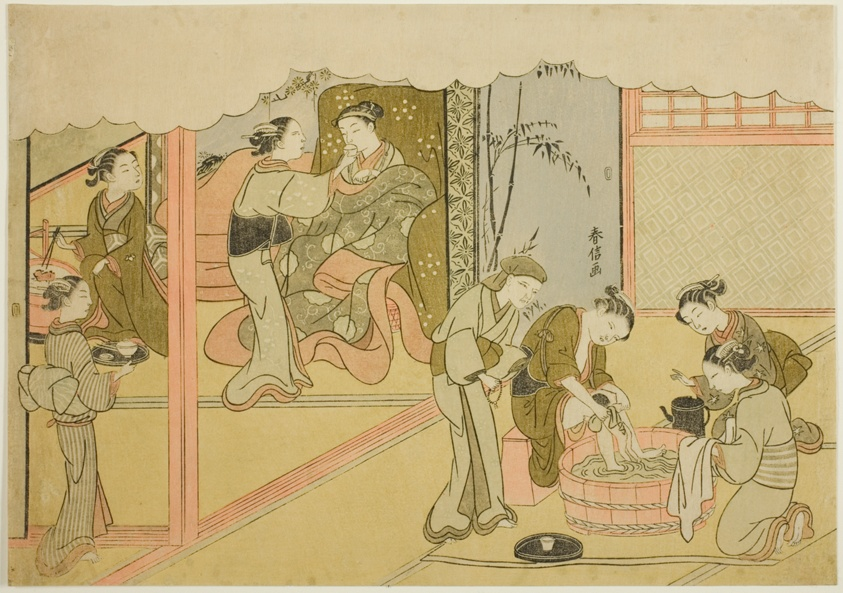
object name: Print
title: The First Childbirth (Uizan), the seventh sheet of the series "Marriage in Brocade Prints, the Carriage of the Virtuous Woman (Konrei nishiki misao-guruma)"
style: Japanese (culture or style)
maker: Suzuki Harunobu 鈴木 春信; Japanese, 1725 (?)-1770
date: c. 1769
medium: Color woodblock print; chuban yoko-e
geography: Japan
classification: woodblock print; print; asian art